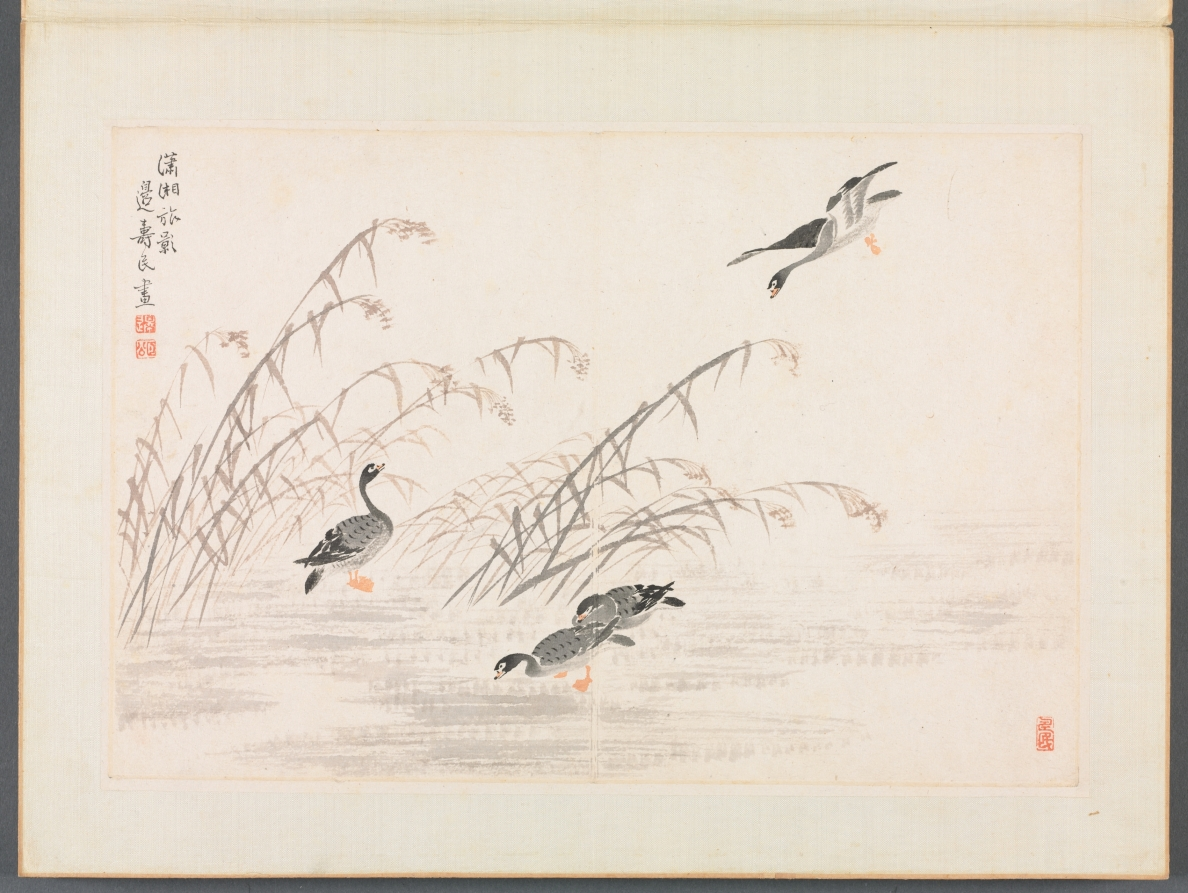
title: Album of Calligraphy and Paintings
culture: China, Qing dynasty (1644-1911)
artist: Bian Shoumin (Chinese, 1684–1752)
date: first half of the 1700s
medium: album leaf; ink and color on paper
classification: Painting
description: The artist Bian Shoumin is known for his depiction of wild geese, water, and reeds. The migrant birds in autumn and winter evoked, in the minds of the Chinese intelligentsia, a time of parting and sorrow.